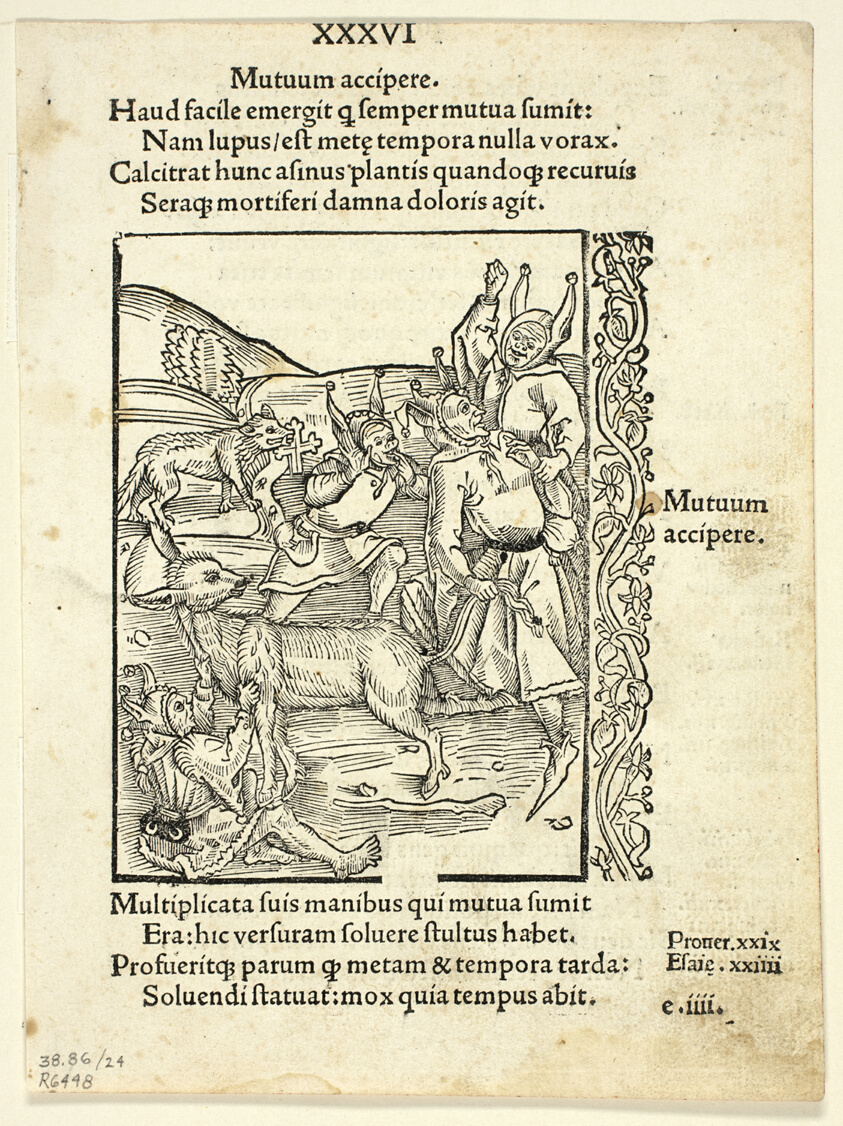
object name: Print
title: Raising Loans from Navis Stultifera (Ship of Fools), Plate 24 from Woodcuts from Books of the 15th Century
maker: Master of the Bergmann Press (Basel, 15th century); printed and published by Johann Bergmann de Olpe (German, flourished 1494-1499); original text by Sebastian Brant (German, 1457–1521); portfolio text by Wilhelm Ludwig Schreiber (German, 1855–1932)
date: 1497, portfolio assembled 1929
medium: Woodcut in black, and letterpress in black (recto and verso), on cream laid paper, tipped onto cream wove paper mat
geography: Switzerland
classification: woodcut; print; prints and drawing